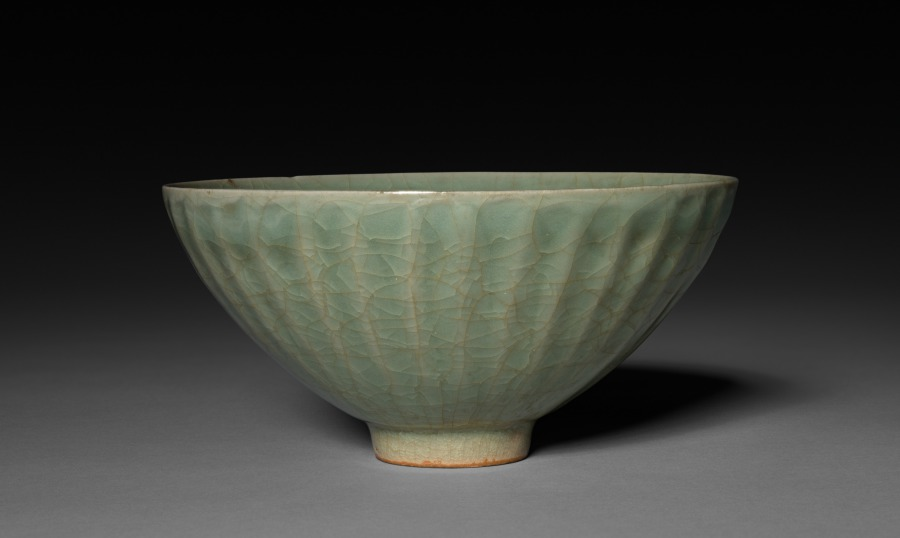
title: Bowl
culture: China, Southern Song dynasty (1127-1279)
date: 1200s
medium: glazed buff stoneware, Southern Celadon ware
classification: Ceramic